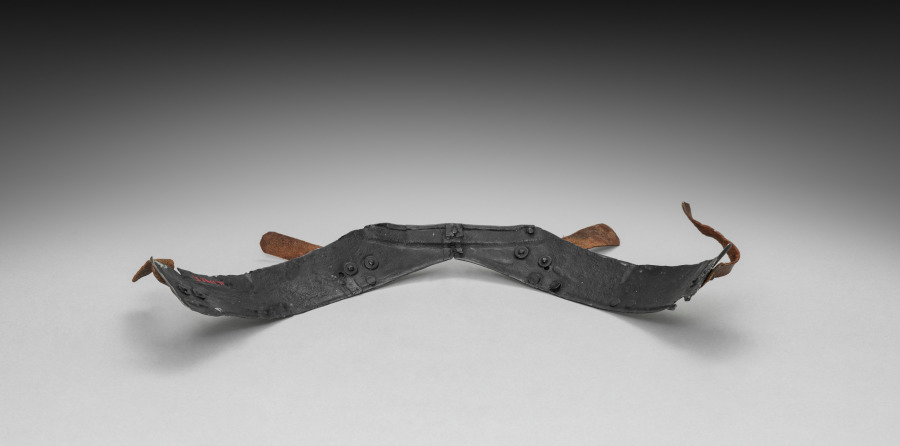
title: Fauld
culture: Germany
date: c.1550–1570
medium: iron, steel, leather and brass rivets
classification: Arms and Armor